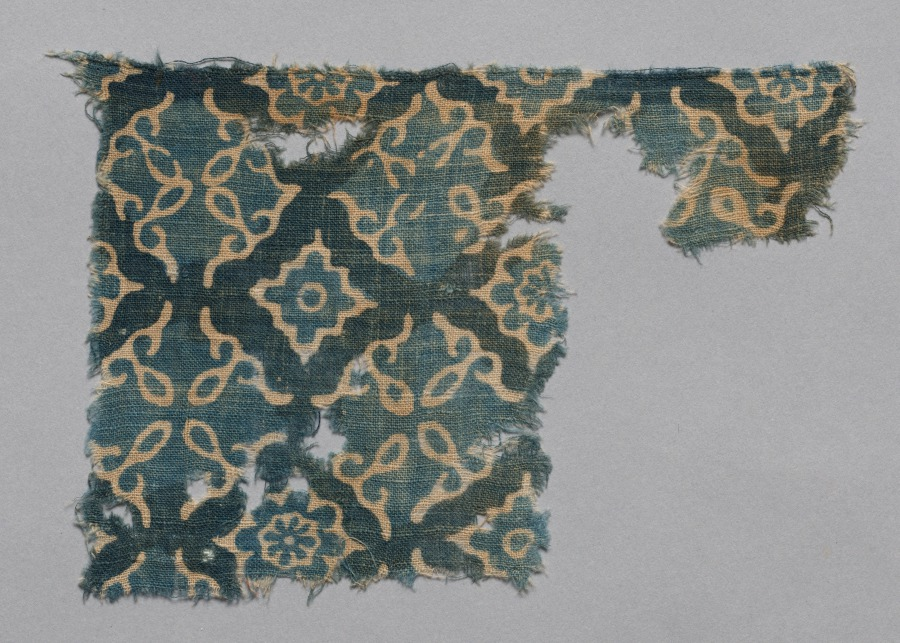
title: Fragment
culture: India, 12th-14th century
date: 1100s - 1300s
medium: plain cloth, resist dyed; cotton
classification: Textile